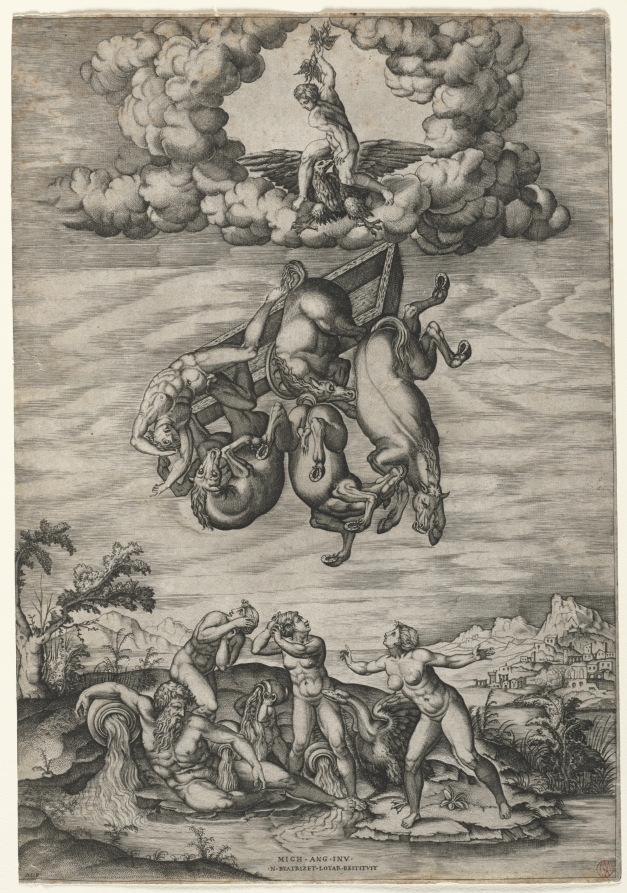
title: The Fall of Phaeton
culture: France, 16th century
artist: Nicolas Beatrizet (French, active Italy, 1507 or 1515-about 1565)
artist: after Michelangelo Buonarroti (Italian, 1475–1564)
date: c. 1545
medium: engraving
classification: Print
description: Michelangelo gave a finished drawing of the Fall of Phaeton to his close friend Tommaso de’ Cavalieri in 1533. Almost immediately, copies of the drawing were made in the form of plaques and prints without direct involvement from Michelangelo himself. This engraving by a French artist working in Rome closely follows Michelangelo’s composition for the scene but adds landscape elements in the background. In this myth from Ovid’s Metamorphoses, Phaeton, son of the sun-god Helios, drives his father’s chariot across the sky but loses control, endangering the earth. Zeus intercedes to kill him with a thunderbolt. Below, Phaeton’s mourning sisters transform into trees.